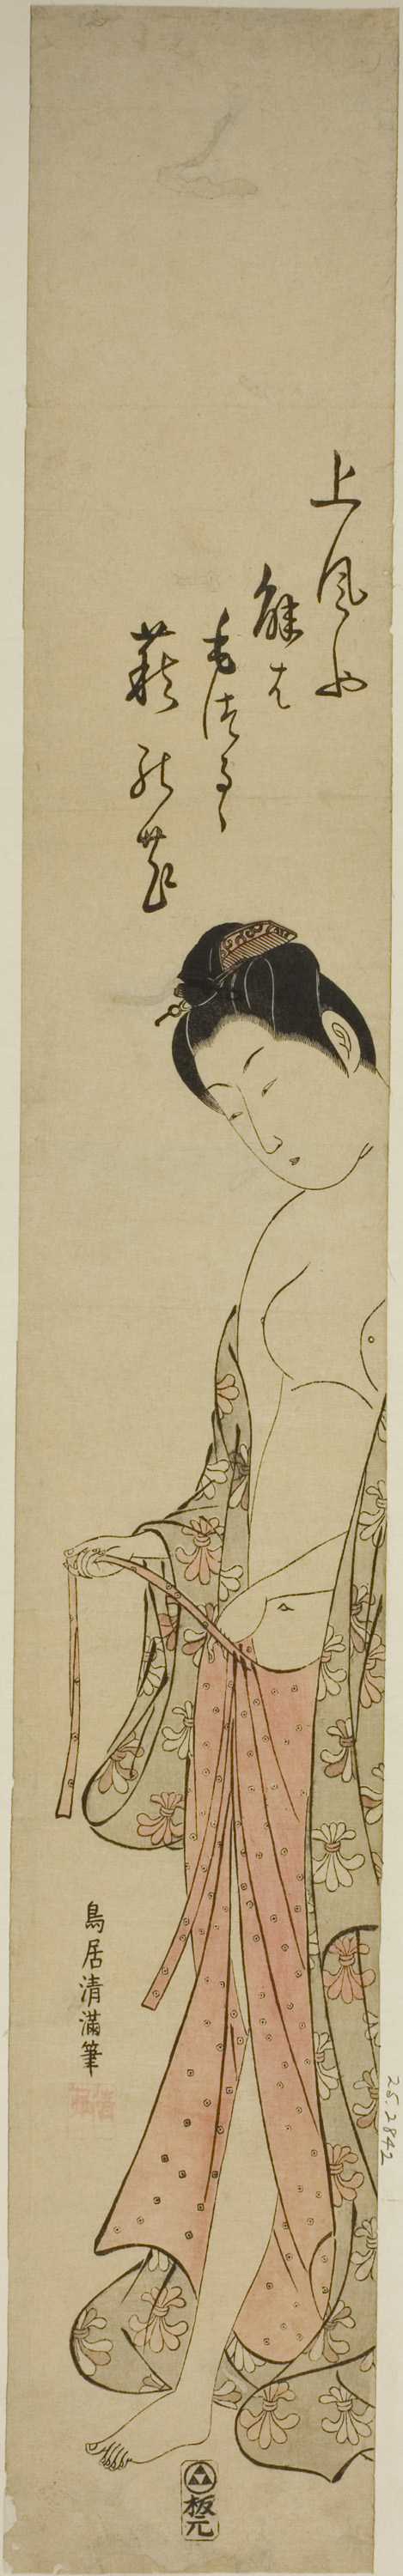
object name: Print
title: Woman dressing after a bath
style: Japanese (culture or style)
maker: Torii Kiyomitsu I (Japanese, 1735-1785)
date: c. 1760/64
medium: Color woodblock print; hashira-e, benizuri-e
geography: Japan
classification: woodblock print; print; asian art